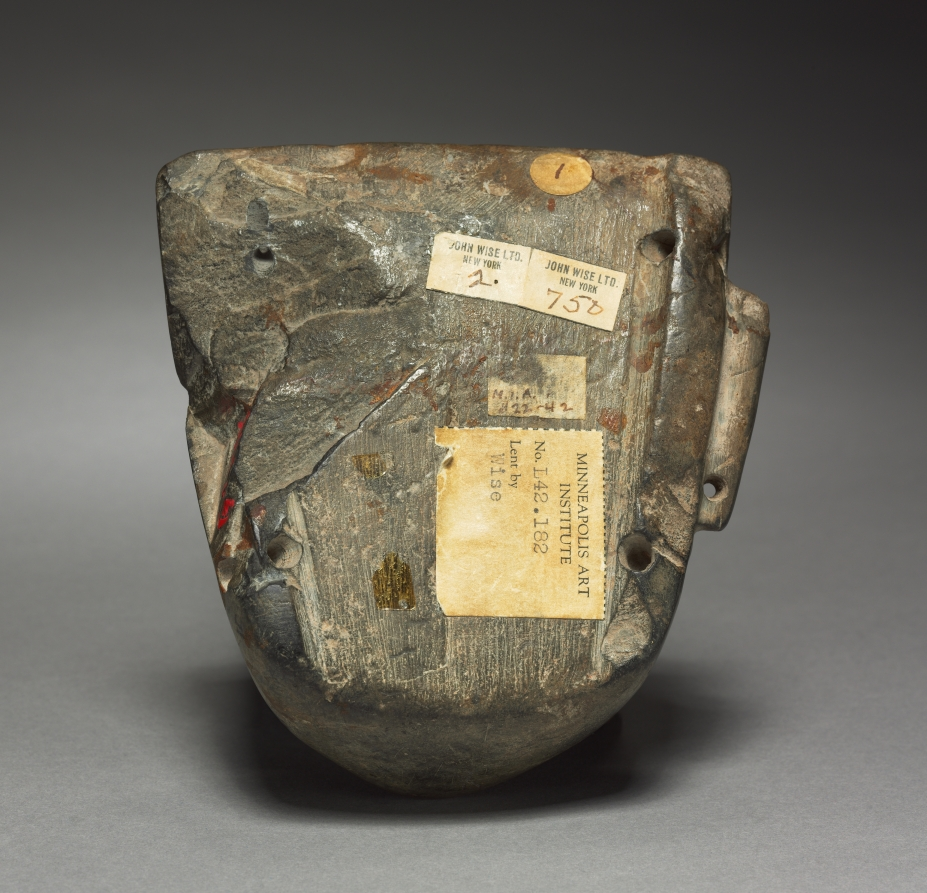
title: Mask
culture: Central Mexico, Teotihuacán style, Classic period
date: 1–550 CE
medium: stone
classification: Sculpture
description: Many Teotihuacán masks were once tied to something via holes on the back--perhaps a body-shaped form dressed in garments, ornaments, and a headdress that identified the figure. The stone masks’ eyes and mouths once held inlays representing irises, pupils, and teeth.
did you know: These stone masks have been found near temples, but not in homes or burials.